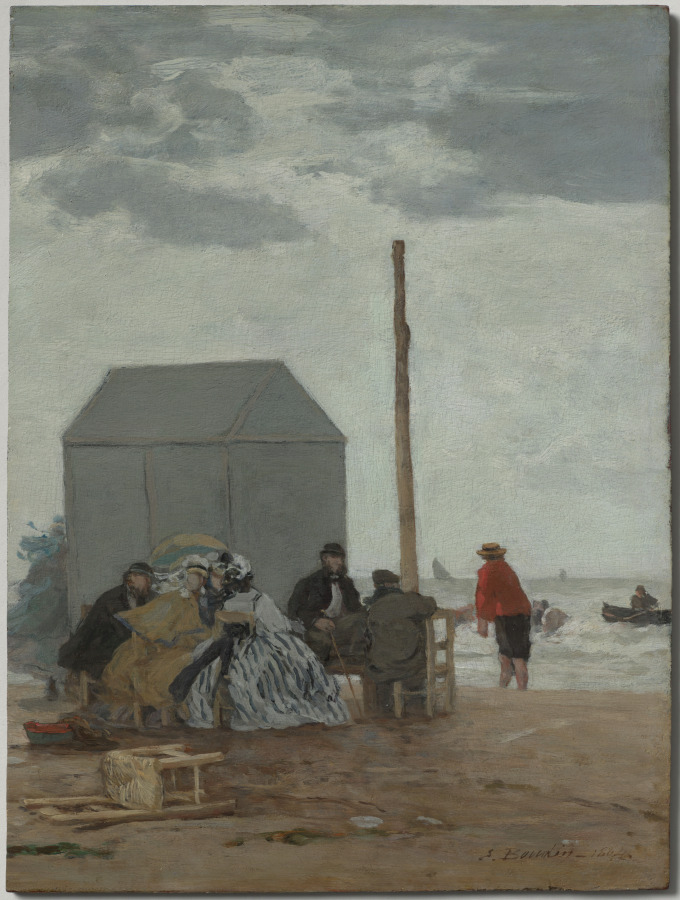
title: The Beach at Deauville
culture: France, 19th century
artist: Eugène Boudin (French, 1824–1898)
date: 1864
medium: oil on wood panel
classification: Painting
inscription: Signed in brown paint lower right corner: E. Boudin 1864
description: During the 1860s, Boudin executed many paintings and watercolors representing well-to-do tourists and vacationers enjoying seaside resorts in Normandy, principally Trouville and Deauville. In this scene, the informally posed figures suggest a sense of relaxation and intimacy. The overturned chair in the foreground underscores the impression of a casually observed moment, as though a sea breeze or a quick departure by its former occupant has upended it. The majority of Boudin's small oil paintings of beach scenes of the 1860s were executed on wood panel. After laying down a thin white ground, Boudin seems to have begun painting directly, not drawing or laying in guidelines for the forms. The result is a freshness and airiness appropriate to a windy day at the beach.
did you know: Boudin evokes the feeling of wind by painting the fluttering blue dress, the beach walker leaning to the left, the whitecaps on the water, and the angle of the sails on the boat in the distance.